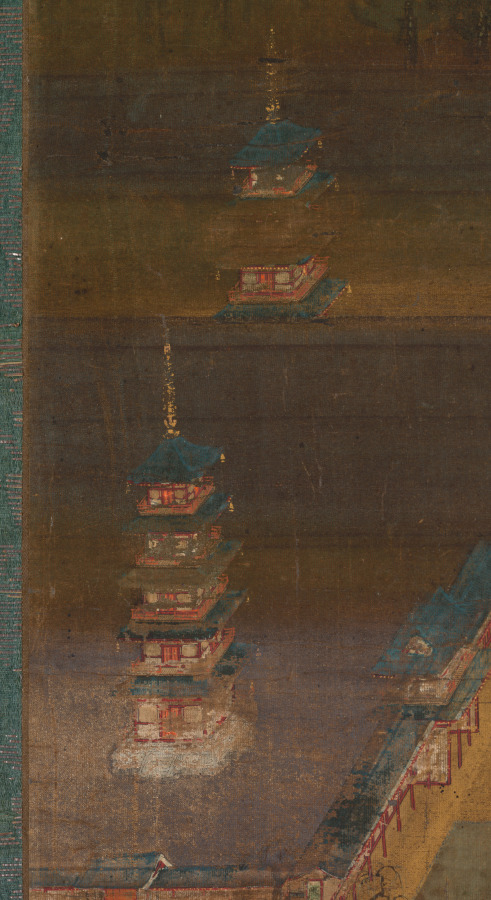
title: Kasuga Shrine Mandala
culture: Japan, Kamakura period (1185–1333)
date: early 1300s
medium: Hanging scroll; ink, color, and gold on silk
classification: Painting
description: A golden path beginning at the bottom of this painting leads up to four red-and-white buildings to the left, then to a fifth building on the right. These are the five shrine halls of Kasuga Taisha in Nara. Above and beyond the buildings is a sacred mountain range––with Mount Mikasa at center, Mount Wakakusa in gold to the left, and the sun or moon rising up behind the mountains. Sacred deer appear here and there. Five figures representing the original Buddhist forms of the five kami of the shrine complex stand on clouds above the mountains.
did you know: Sacred deer, the vehicles of the Kasuga deities, move about the shrine compound.